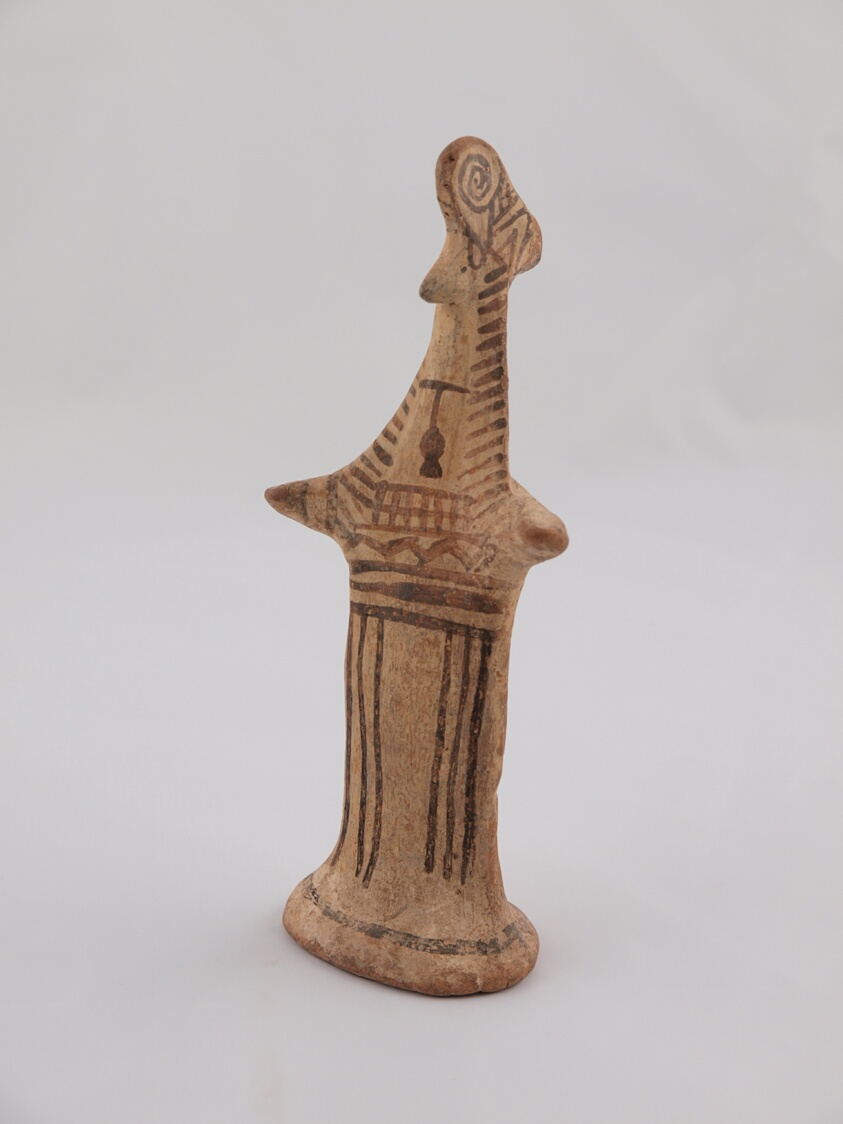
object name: Sculpture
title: Statuette of a Goddess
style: archaic (greek)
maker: Greek; Boeotia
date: 600-580 BCE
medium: terracotta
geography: Dhodhóni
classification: statuette; earthenware; ceramics; sculpture; ancient art; ritual objects